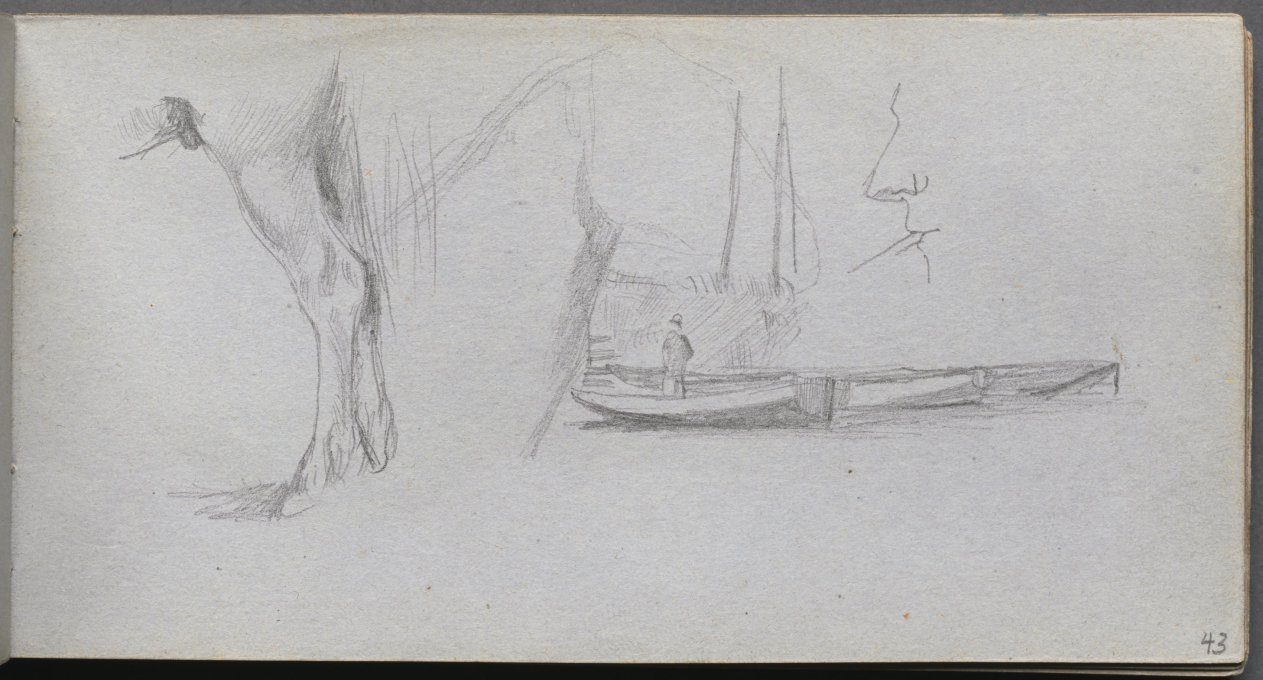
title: Sketchbook, page 43: Studies: Horse's leg, Figure in a Boat, and Profile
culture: France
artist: Ernest Meissonier (French, 1815–1891)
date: c. 1860s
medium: graphite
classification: Bound Volume